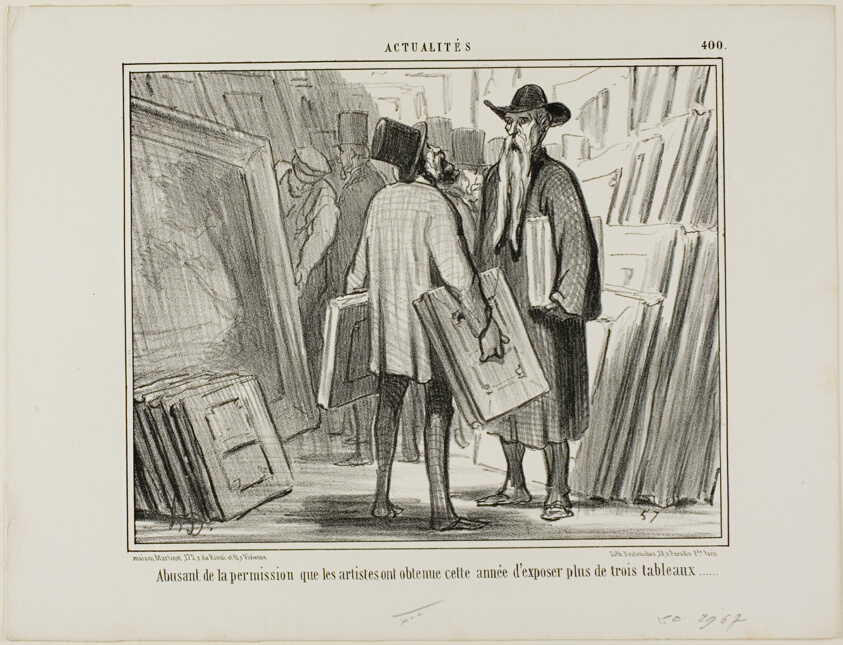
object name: Print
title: Some artists are taking advantage of this year's permission to exhibit more than three paintings, plate 400 from Actualités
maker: Honoré Victorin Daumier; French, 1808-1879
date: 1857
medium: Lithograph in black on white wove paper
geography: France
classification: lithograph; print; prints and drawing